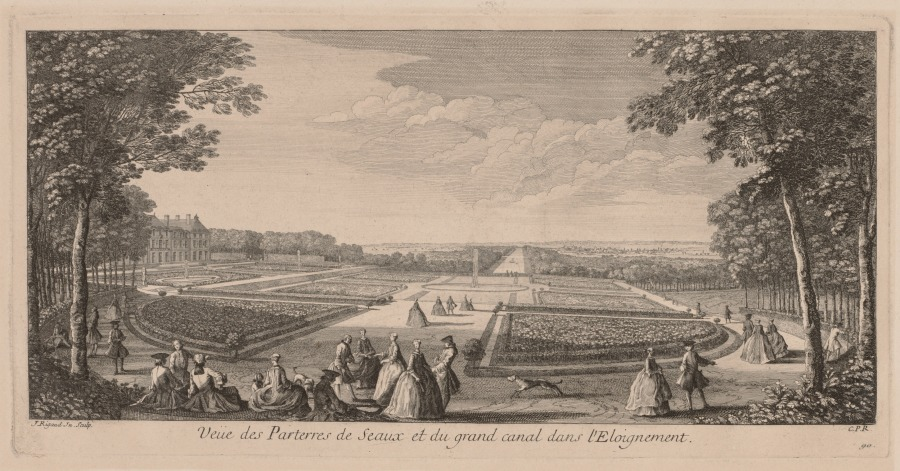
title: Flower Gardens of Seaux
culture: France, 18th century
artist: Jacques Rigaud (French, 1681–1754)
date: 1736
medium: engraving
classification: Print